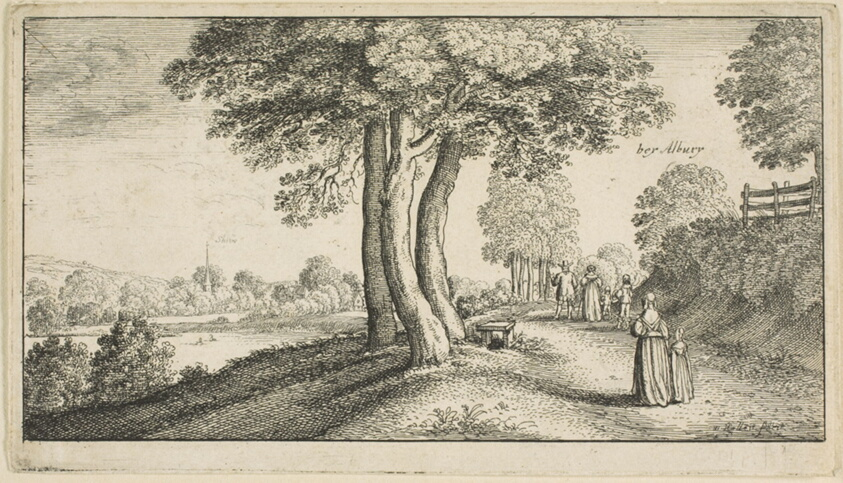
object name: Print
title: Albury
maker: Wenceslaus Hollar (Bohemian, 1607-1677)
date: c. 1645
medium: Etching on ivory laid paper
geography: Bohemia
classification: etching; print; prints and drawing